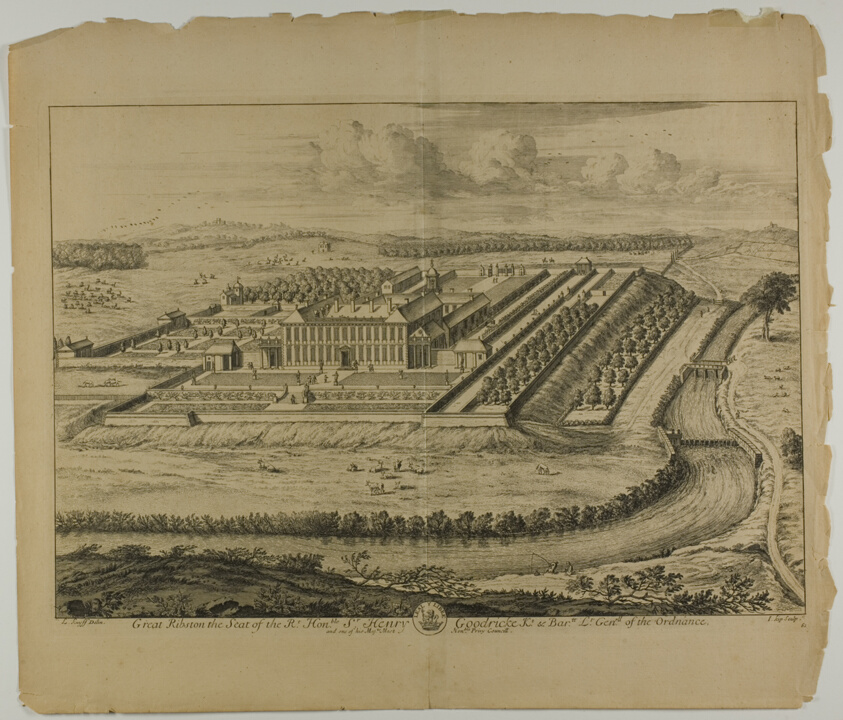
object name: Print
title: Great Ribston, plate 61 from Britannia Illustrata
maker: Jan Kip (Dutch, c. 1653-1722); after Leonard Knyff (Dutch, 1650-1721); published by David Mortier (French, 1673-1728)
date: published 1707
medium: Etching and engraving in black on cream laid paper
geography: Netherlands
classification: prints and drawing; engraving; etching; print